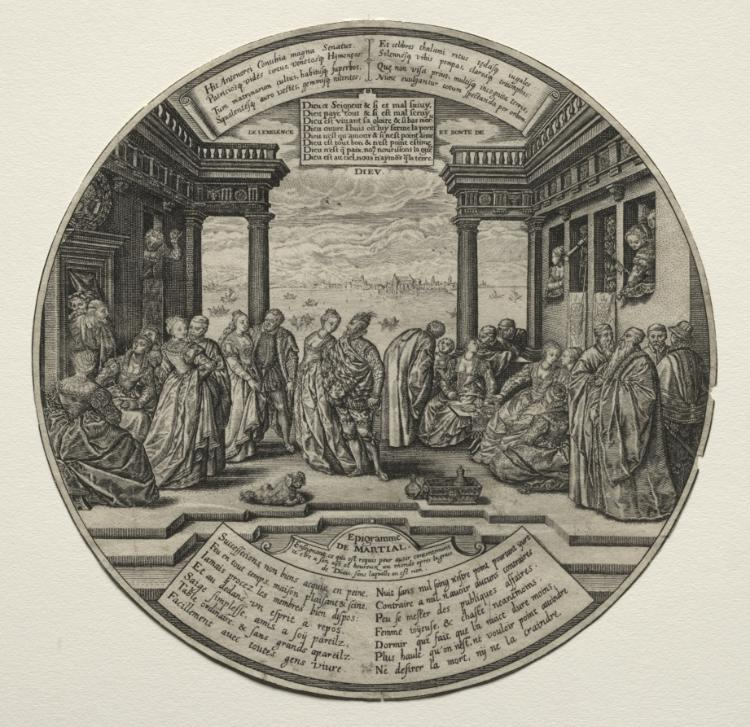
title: The Venetian Ball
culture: Flanders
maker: Johann Theodor de Bry (German, 1561–1623)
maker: after Hendrick Goltzius (Dutch, 1558–1617)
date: 1584–1623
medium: engraving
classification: Print